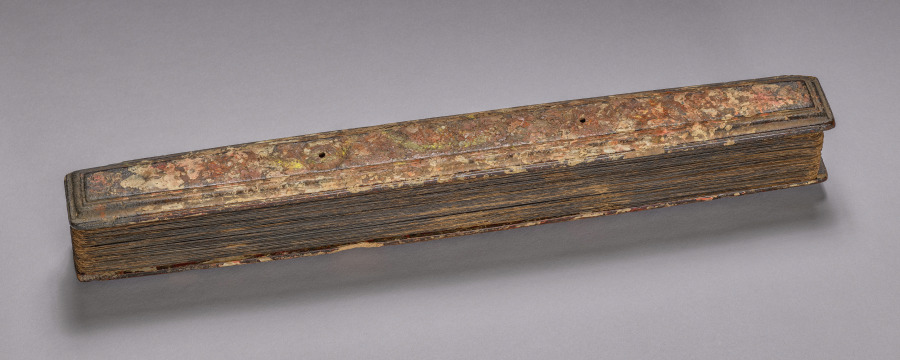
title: Manuscript of the Perfection of Wisdom in Eight Thousand Lines (Ashtasahasrika Prajnaparamita-sutra)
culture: Eastern India, Bihar, Vikramashila Monastery. Paintings: Nepal, Kathmandu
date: Sunday, September 14, 1119 (year 239 of the Newar Samvat in the month of Ashvina)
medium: Covers: Gum tempera, colors, and paper on wood; pages: gum tempera and ink on palm leaves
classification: Painting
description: The colophon at the end of the manuscript indicates that a monk from Nepal named Aryashrimittra traveled to a monastic university in India, where he commissioned this copy of a sacred Buddhist philosophical text. He then brought it with him back to Nepal, where Nepalese artists added paintings of Buddhist goddesses and bodhisattvas. The movement of monks and manuscripts between India and Nepal was the primary mechanism for the transmission of Buddhism to the Himalayas. This manuscript was an object of worship, once venerated alongside sacred Buddhist images. Devotional materials applied during ritual worship remain on the top of the book cover.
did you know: Books of the Perfection of Wisdom were worshiped as sacred objects and personified as the Goddess of Wisdom, Prajnaparamita, the mother of all Buddhas.